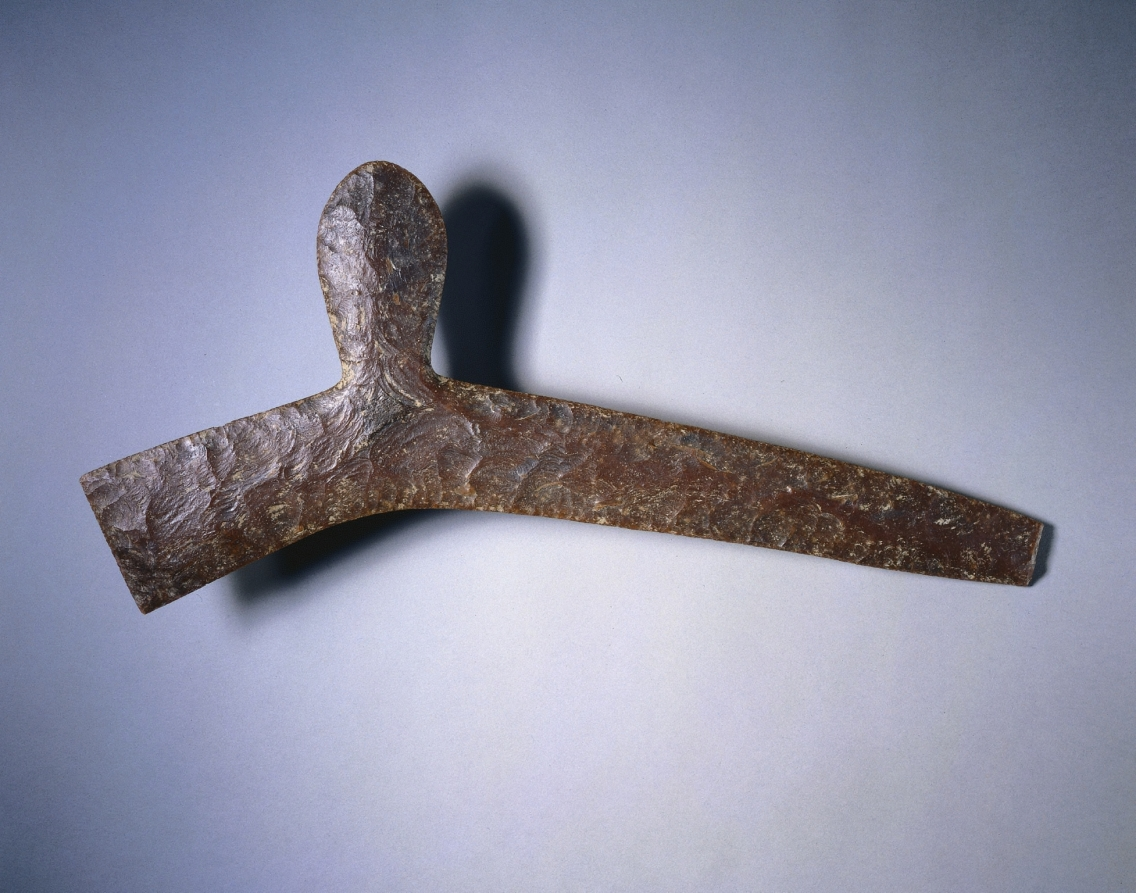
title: Axe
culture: Mexico or Central America, Maya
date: c. 250–900 CE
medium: chipped flint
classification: Implements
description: Axes with stone blades and wooden hafts were used to clear land for planting. This more fragile example, made entirely of chipped flint, is a ceremonial version probably used in rituals before it was deposited in a tomb or an offering. Late Classic Maya vase paintings make the ceremonial associations of axes clear. In these painted scenes, axe-wielding deities dance among skeletons and supernatural animals, or raise the axe to strike a sacrificial victim.